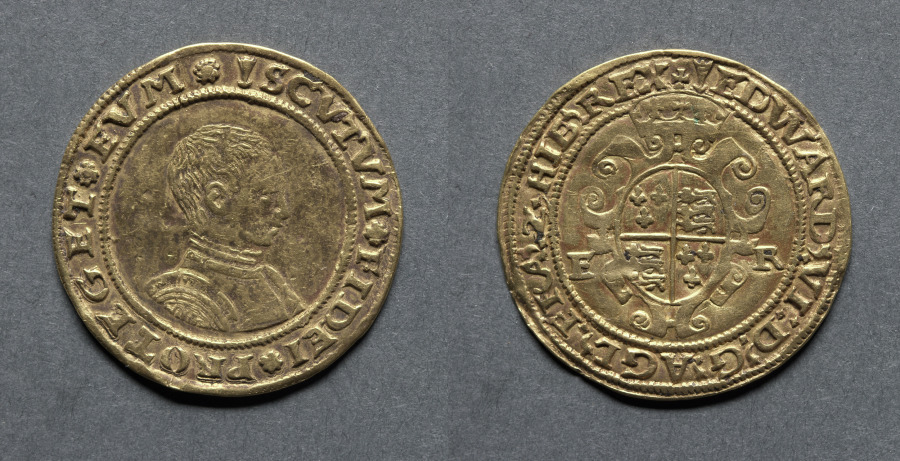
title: Half Sovereign: Edward VI (obverse); Crowned Royal Arms (reverse)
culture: England, Edward VI, 1547-1553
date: 1549–50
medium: gold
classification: Coins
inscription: SCVTM FIDEI PROTEGET EVM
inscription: EDWARD VI D G AGL FRA HIB REX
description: During the first coinage period, April 1547 to January 1549, debased coinage was still issued. Part of it still had the name and portrait of Henry VIII; part of it the name of Henry, but a youthful portrait; and part of it the name of Edward. The series is thus complex and some of the chronology open to doubt. In 1549, the beginning of the second coinage period, the first step was taken to restore the standard of the coinage. Gold, including the piece shown, was struck in 22 ct. This coin shows the young king uncrowned, the only occasion on which the king's portrait is so shown.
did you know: Edward VI's short reign as king of England ended in 1553 when he died at the age of 15.